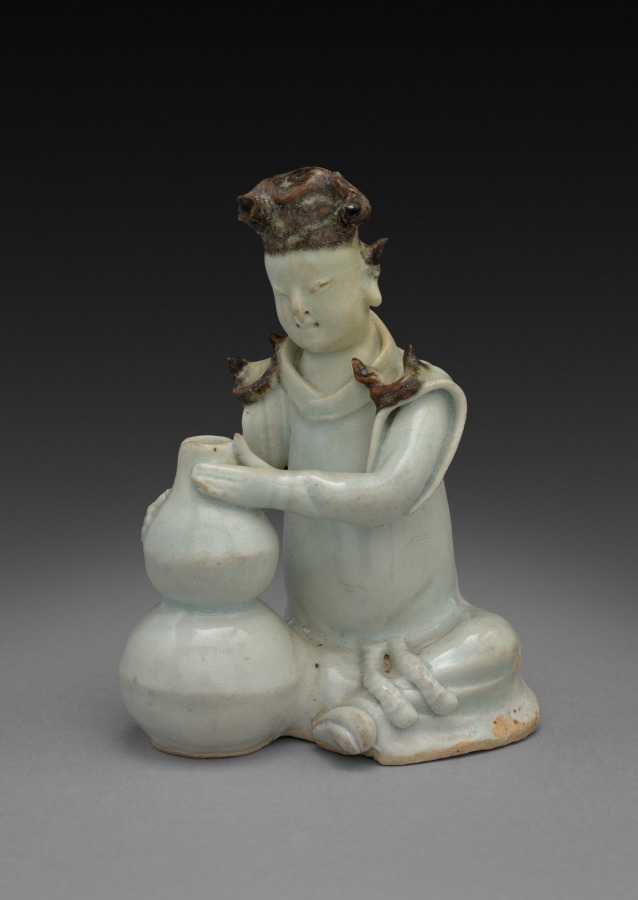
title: Potter Seated with Double Gourd Vase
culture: China, Yuan dynasty (1271-1368) - Ming dynasty (1368-1644)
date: 1300s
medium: Porcelain with underglaze decoration, qingbai ("blue-white") ware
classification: Ceramic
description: Made in South China, this figurine of a potter holding a double-gourd vase was probably once used as a toy. The coarse white porcelain form is covered with thin light greenish-blue, qingbai, glaze. The potter's cap and the coils on his shoulders are painted with blackish-brown ferruginous slip. The glaze stops short of the slightly recessed base, which is burnt a very light pinkish-buff color.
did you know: The double gourd is traditionally regarded as a talisman that protected children against diseases.